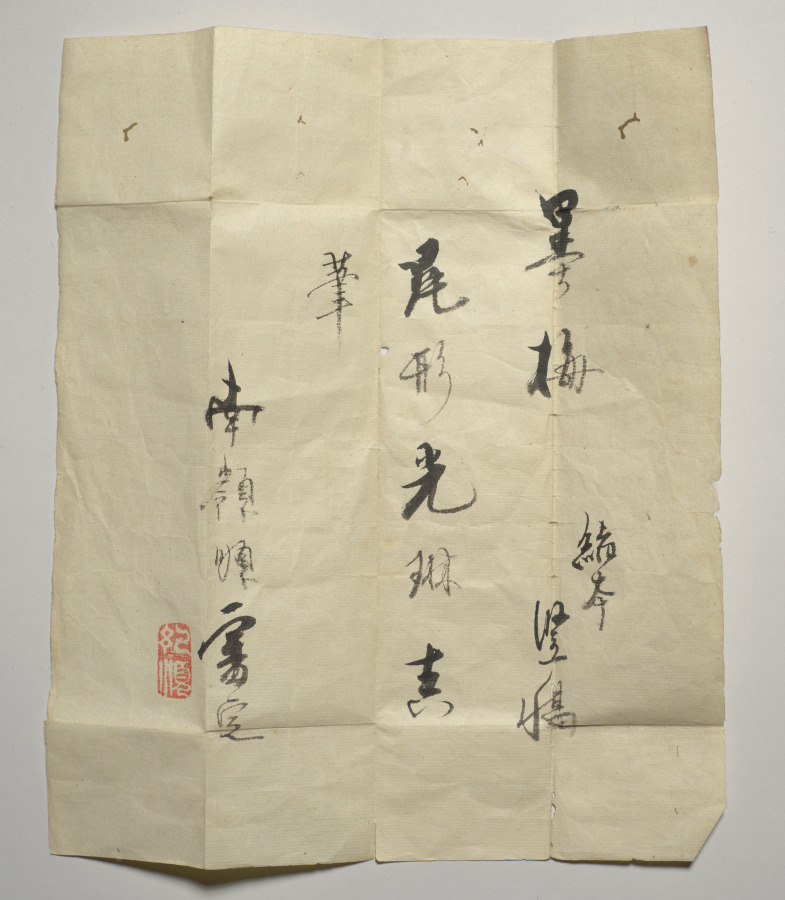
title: Plum Tree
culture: Japan, Edo period (1615–1868)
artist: Ogata Kōrin (Japanese, 1658–1716)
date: c. 1700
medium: hanging scroll; ink on silk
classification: Painting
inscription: Artist's signature and seal above hillock bottom right corner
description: Ogata Kōrin had to think through his design carefully to create these white plum blossoms and deliver their effect, as he used the reserve technique—where selected areas of the painting surface are left unpainted—to achieve it. He probably roughed in the tree before applying an ink wash to the entire silk surface, except where he intended to place the flowers. He likely then returned to articulate the petals and, in some cases, the pistils and stamens. The composition shows the tree twisting out of view, only to return with a branch of new growth jabbing forth from an old, broken limb, thereby heightening the visual impact of the blossoms.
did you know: The Rinpa style of painting is named for Ogata Kōrin, even though he did not create it.